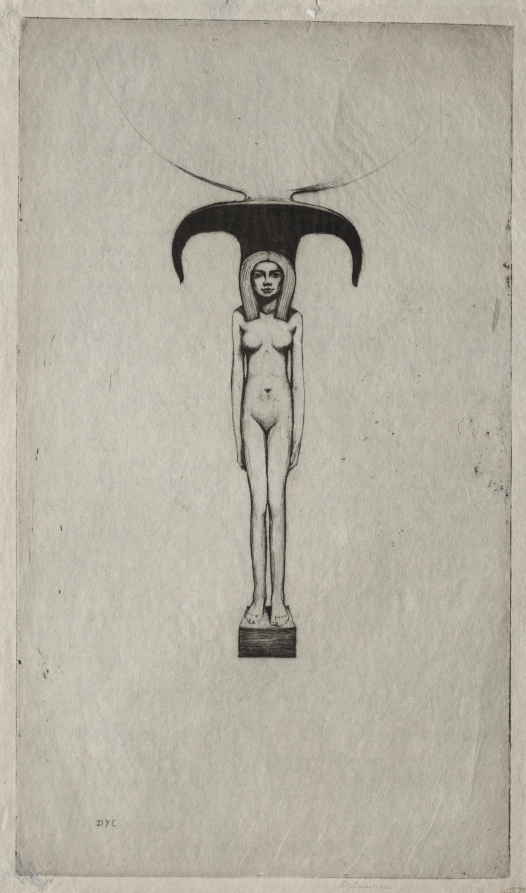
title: An Egyptian Mirror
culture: England, 20th century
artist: David Young Cameron (British, 1865–1945)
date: 1909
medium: etching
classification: Print